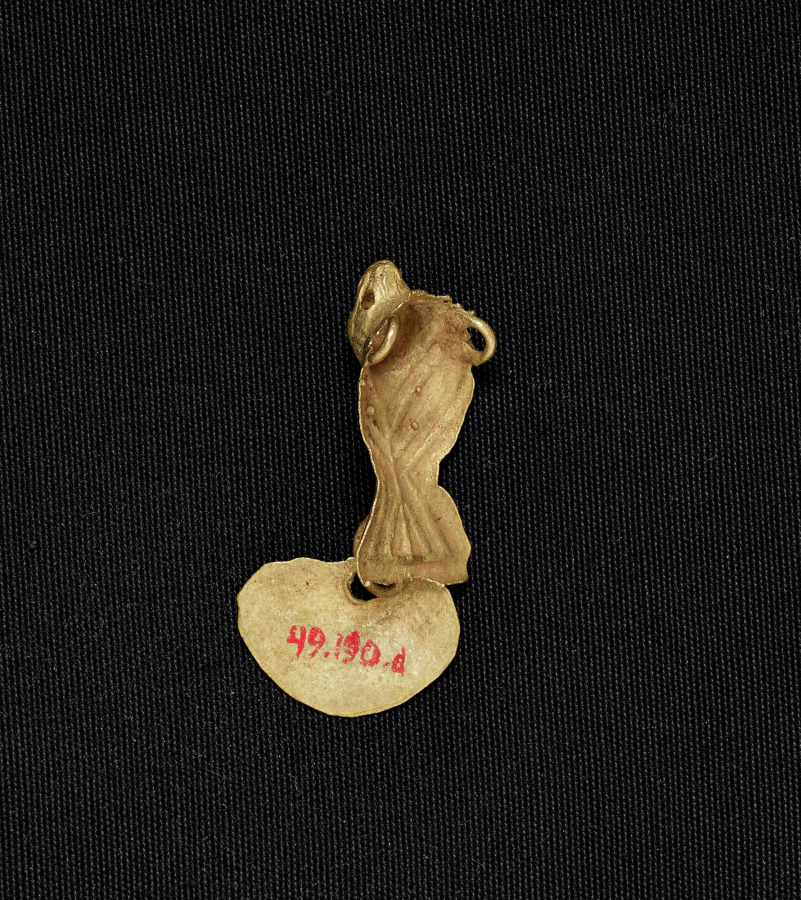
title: Bird Bead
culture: Colombia, Muisca style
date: c. 900–1550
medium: cast gold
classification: Jewelry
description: Muisca metalwork divides into two categories: ornaments to be worn, such as these, and offering figurines, in the case to the right. The elaborate bird pendant features delicate herringbone moldings, openwork patterns, and wing details-all part of the wax model from which the pendant was cast (see nearby computer animation). The dangles were attached after casting.